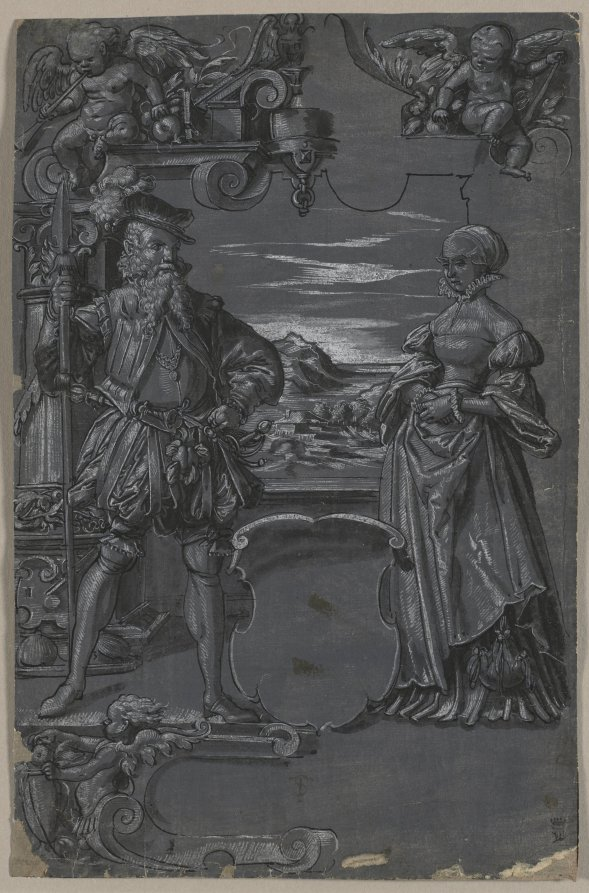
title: Design for Glass Painting: Man and Woman in Architectural Setting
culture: Switzerland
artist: attributed to Tobias Stimmer (Swiss, 1539–1584)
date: second half 1500s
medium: pen and black ink and brush and gray wash, heightened with white gouache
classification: Drawing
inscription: falsely signed, lower center, in brown ink: [artist monogram: TS]